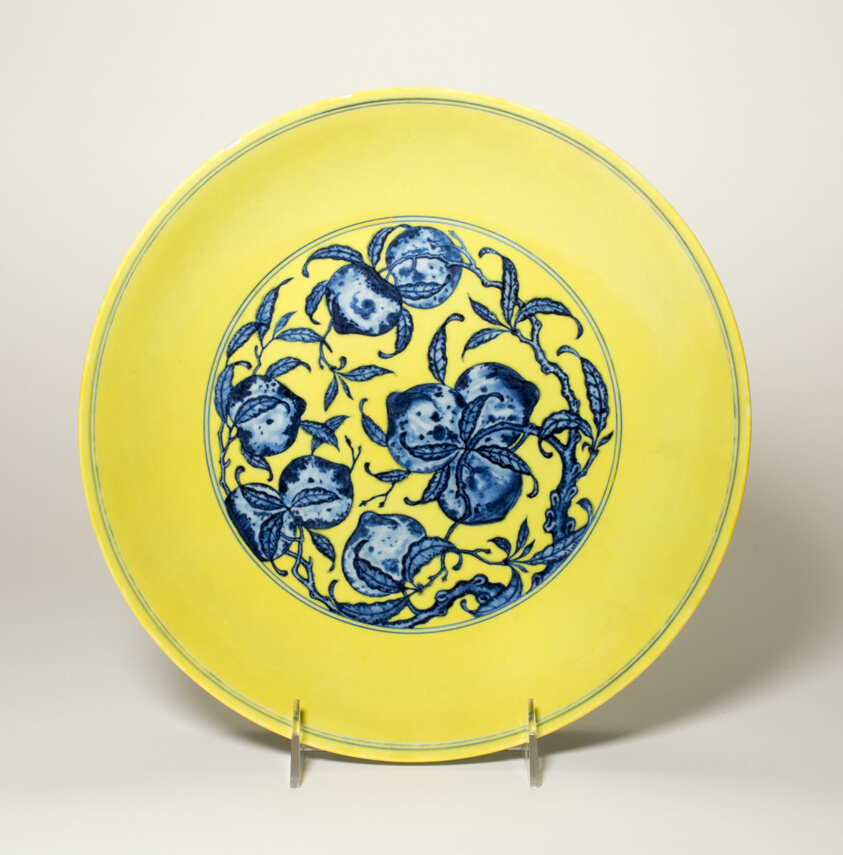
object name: Vessel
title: Dish with Peaches and Morning Glory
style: Chinese (culture or style)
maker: China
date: Qing dynasty (1644–1912), probably 19th century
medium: Porcelain painted in underglaze blue and overglaze yellow enamel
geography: China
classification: dish (vessel); porcelain; ceramics; asian art; vessel